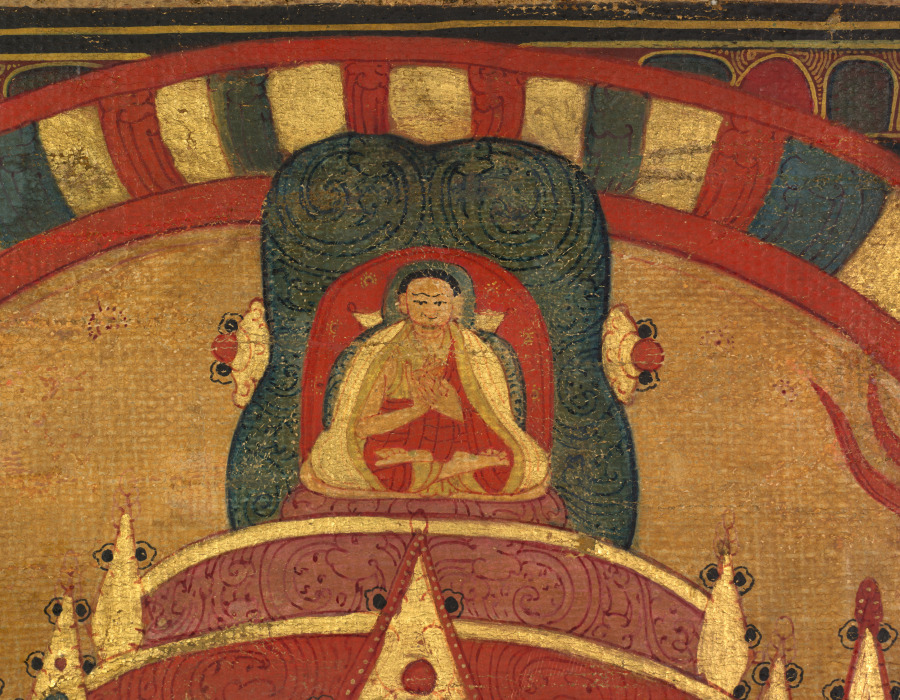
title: Tantric Buddha Vairochana as Vajrasattva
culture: Central Tibet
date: c. 1150–1200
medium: gum tempera, ink, and gold on cloth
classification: Painting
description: The seated Buddha dominating the composition is identified as Vairochana because of his hand gesture, the mudra communicating supreme enlightenment in which the index finger of one hand is grasped by the fingers of the opposite hand. His golden color and the tiny vajra—a six-pronged ritual object representing a thunderbolt—balanced on top of his finger suggest that he is in the guise of Vajrasattva, the summation of all enlightened beings. In his crown is the image of a monk, who is probably the guru of the donor, the small monastic figure at the lower right next to the lotus pedestal.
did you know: A mantra written behind the figures invokes their living presence in the thangka painting.